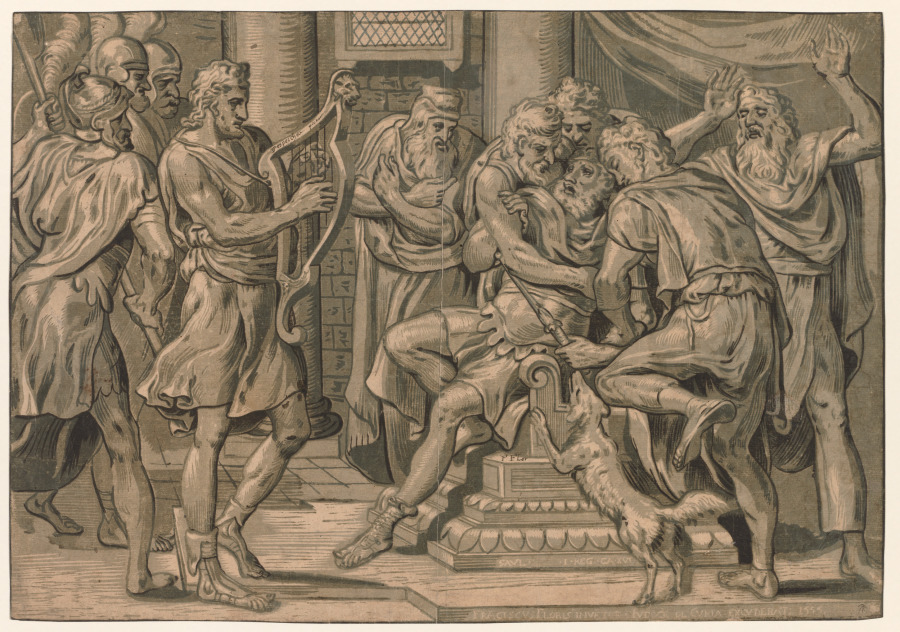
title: David Playing the Harp before Saul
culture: Netherlands, 16th century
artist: after Frans Floris (Netherlandish, 1519–1570)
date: 1555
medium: chiaroscuro woodcut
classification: Print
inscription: in block, " SAVL I REG CA XVI/FRACISCVS FLORIS INVETOR IVDOCE DL CVRIA EXCVDERAT 1555". (Later) inscriptions in the image penned in black. VERSO: Additional inscriptions in brown ink and graphite.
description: The soothing effect of David’s music upon the melancholic King Saul, as relayed in the Old Testament and depicted here by Frans Floris, is the earliest visual evidence of the therapeutic use of music. Floris’s woodcut would have had contemporary relevance in its affirmation of Martin Luther’s belief that music-a divine power that creates order—had been made by God to combat the destructive power of evil.